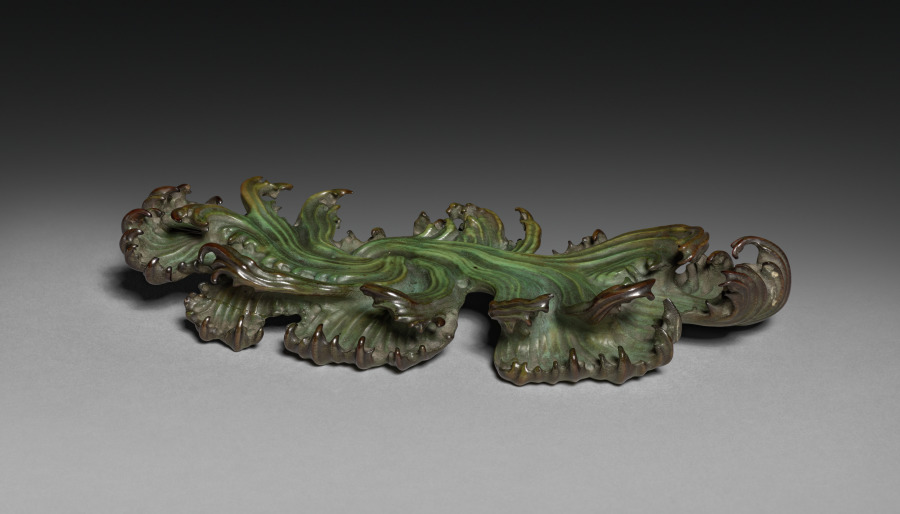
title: Figure of Daoist Immortal He Xiangu (base)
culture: China, Qing dynasty (1644-1911)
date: 1700s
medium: Colored ivory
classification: Wood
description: He Xiangu is one of the Eight Immortals in the Daoist pantheon. She was thought have been a real person who lived in the Tang dynasty, originally named He Qiong. As a teenager, she was instructed in a dream to eat powdered mica to become immune from death and to vow to remain unmarried. She did so and became an enlightened practitioner of Daoism. In this delicate carving, He Xiangu is placidly seated in a gnarled and knotty wooden raft amid green-tinted ivory waves. In front of her rests a bamboo basket filled with objects associated with Daoist immortality, while she holds a branch of lingzhi fungus.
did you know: He Xiangu's boat rests on a wave-shaped base carved from ivory that has been dyed green.